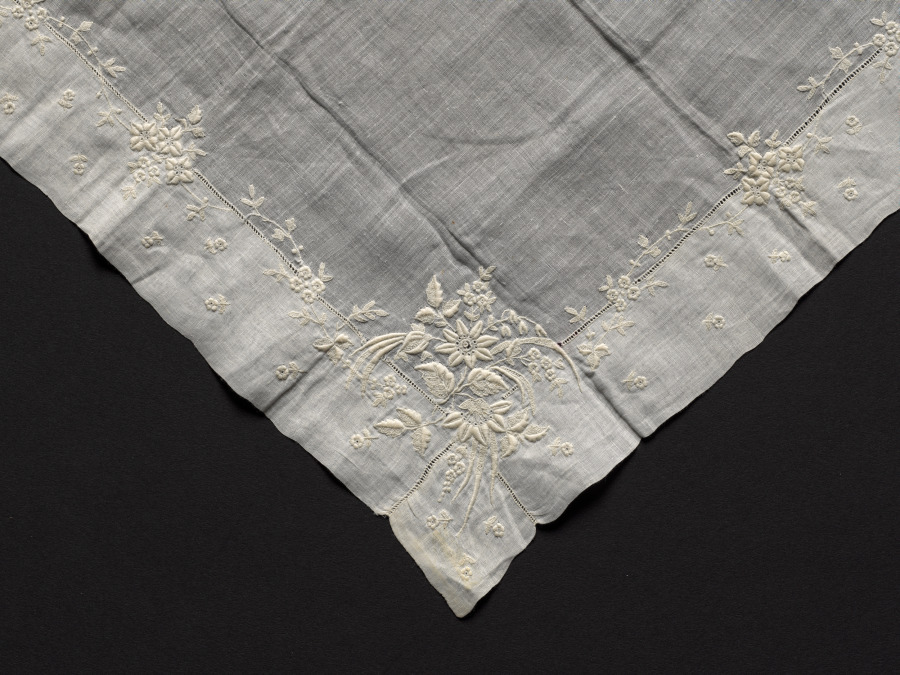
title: Embroidered Handkerchief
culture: Switzerland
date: 1880–99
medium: Plain weave linen: embroidered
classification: Embroidery